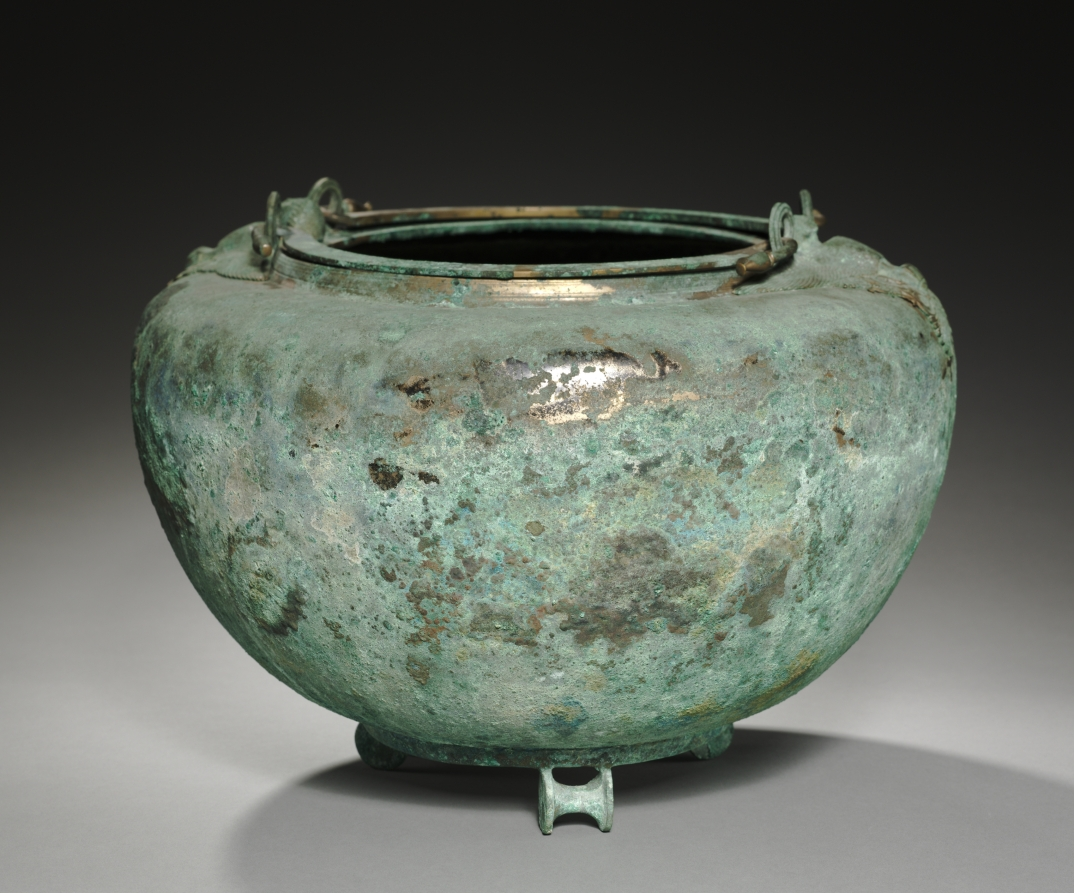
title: Lebes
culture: Greece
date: c. 480–460 BCE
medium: bronze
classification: Metalwork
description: This bronze cauldron has a ring base with three spool feet. Appliqués shaped like birds with the heads of women decorate the shoulder on either side of the vessel. Two handles are fastened to loops on the top of each creature’s wings. The bird-women may represent sirens, mythical creatures that lured sailors with their singing, or harpies, wind spirits that stole food from the starving.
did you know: The green surface found on old bronze is a corrosion product formed when copper in the metal reacts to carbon dioxide and water.